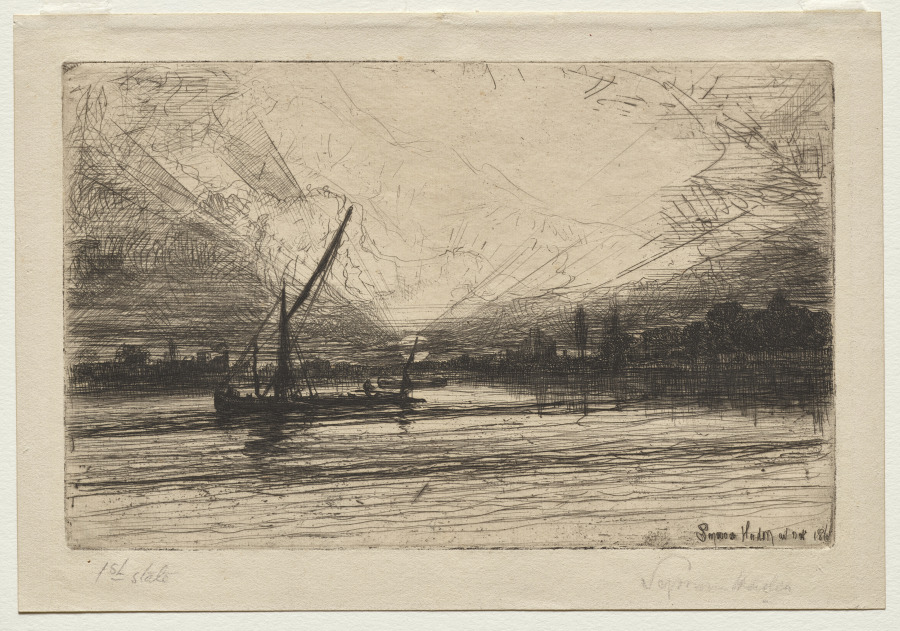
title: Sunset on the Thames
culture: England, 19th century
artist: Francis Seymour Haden (British, 1818–1910)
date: 1865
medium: etching and drypoint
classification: Print